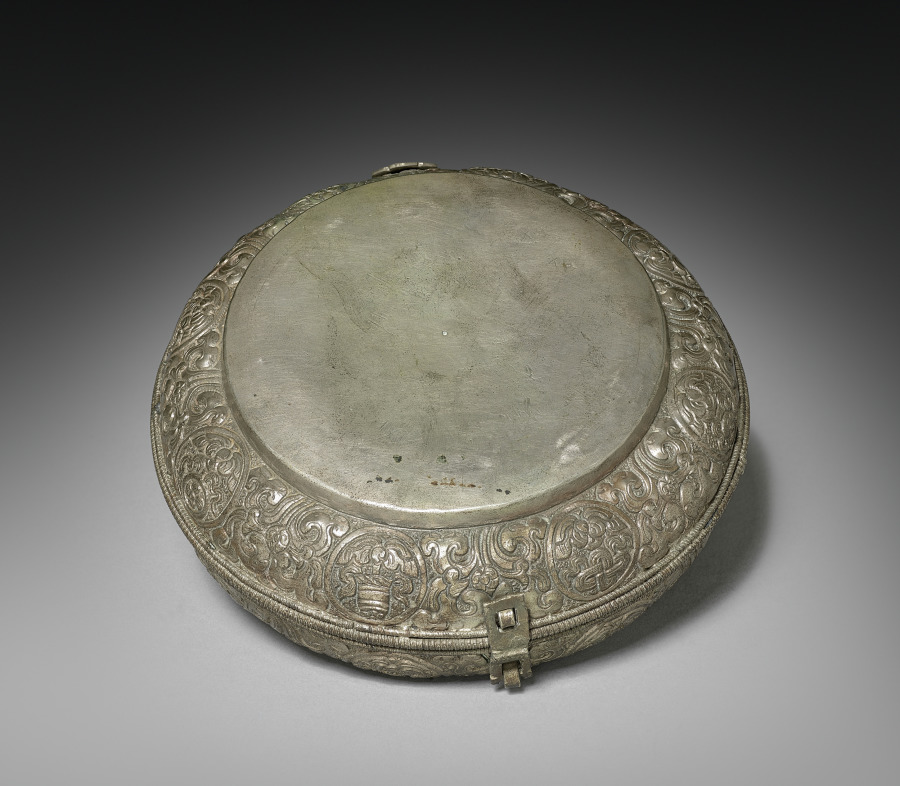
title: Betel Nut Box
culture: Tibet, 19th century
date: 1800s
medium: silver and enamel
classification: Metalwork